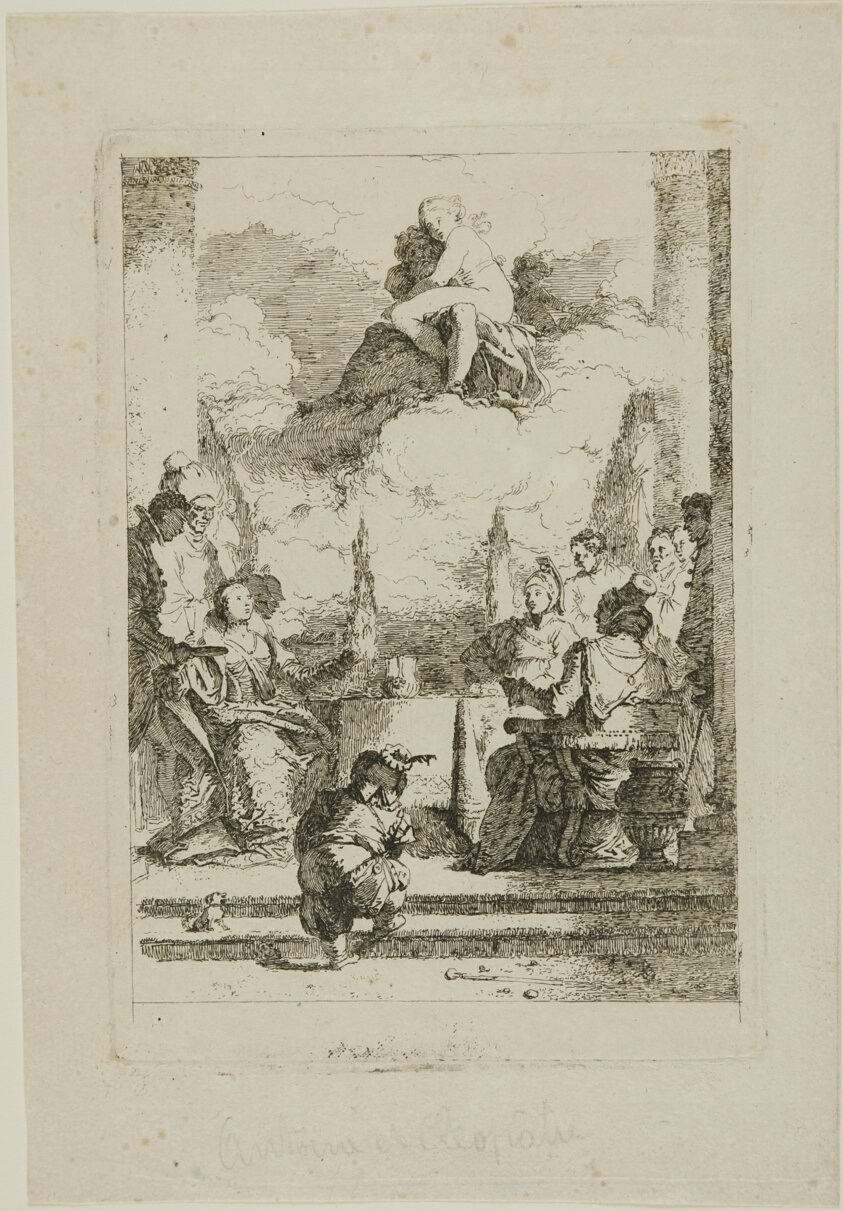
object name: Print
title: The Feast of Anthony and Cleopatra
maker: Jean-Honoré Fragonard (French, 1732-1806); after Giovanni Battista Tiepolo (Italian, 1696-1770)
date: 1763/64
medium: Etching on ivory laid paper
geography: France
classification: prints and drawing; etching; print